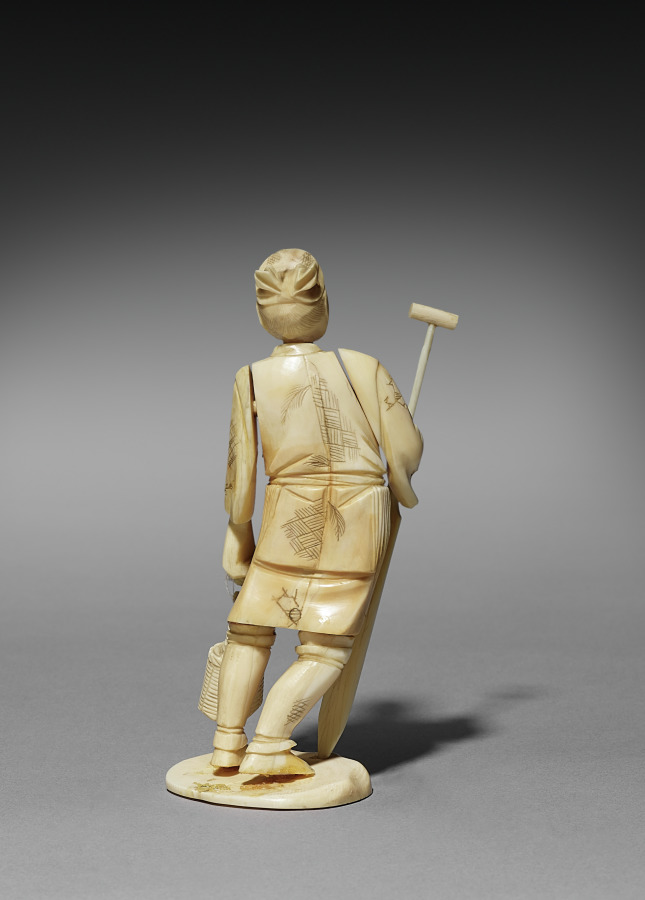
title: Man with a Basket and Paddle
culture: Japan, Meiji period (1868–1912)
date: late 1800s-early 1900s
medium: ivory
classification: Ivory